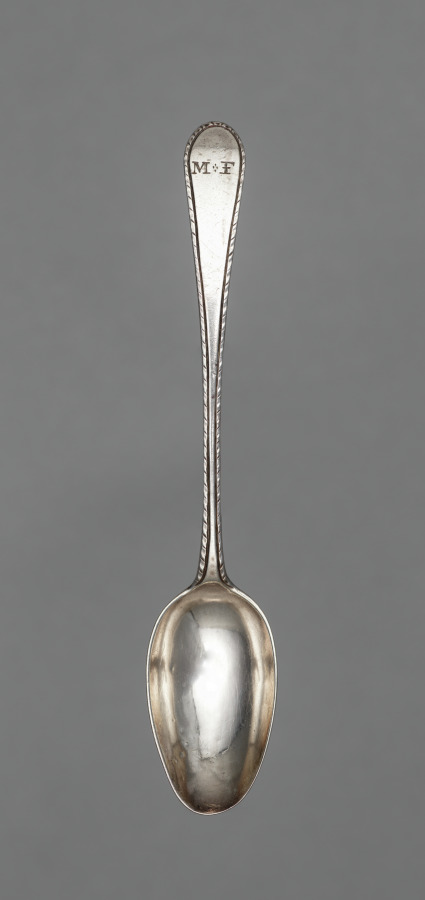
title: Teaspoon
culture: America, New Hampshire, Portsmouth, 18th century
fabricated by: Samuel II Drowne (American, 1749–1815)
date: c. 1770–1780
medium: silver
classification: Silver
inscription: engraved "M+F" in block letters on top of handle end, and "D.F.Wentworth" (later) in script on back of handle end.